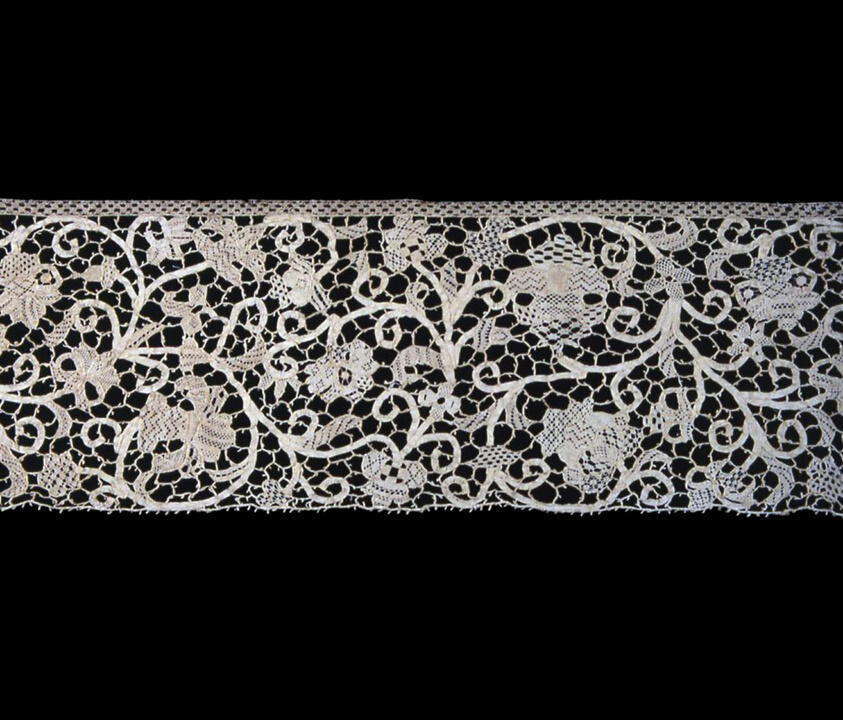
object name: Textile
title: Border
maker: Possibly England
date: 1675/1700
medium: Linen, needle lace with woven tapes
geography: England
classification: textile; lace - mixed